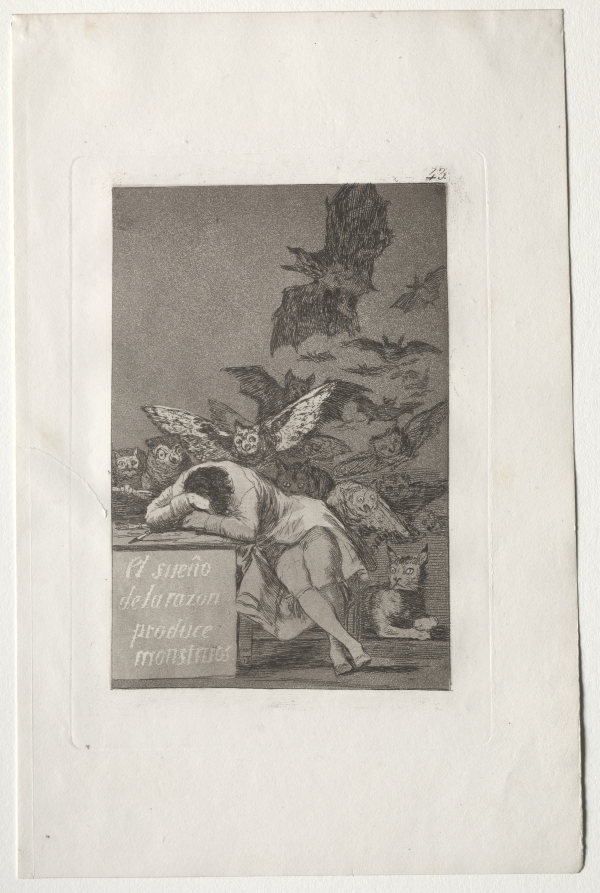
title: The Sleep of Reason Produces Monsters, Plate 43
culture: Spain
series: Los Caprichos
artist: Francisco de Goya (Spanish, 1746–1828)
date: 1799 (c. 1855)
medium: etching and aquatint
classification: Print